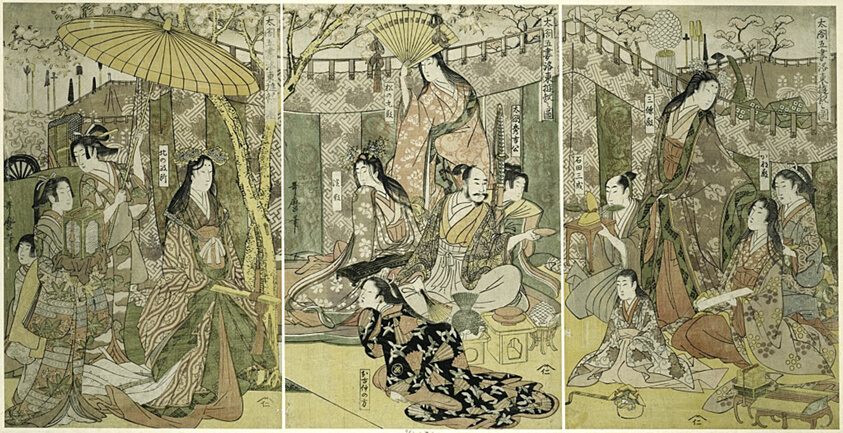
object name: Print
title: Picture of Hideyoshi and his Five Wives Viewing Cherry Blossoms at Higashiyama (Taiko gosai rakuto yukan no zu)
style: Japanese (culture or style)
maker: Kitagawa Utamaro 喜多川 歌麿; Japanese, 1753 (?)-1806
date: c. 1803/04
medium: Color woodblock print; oban triptych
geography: Japan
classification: woodblock print; print; asian art